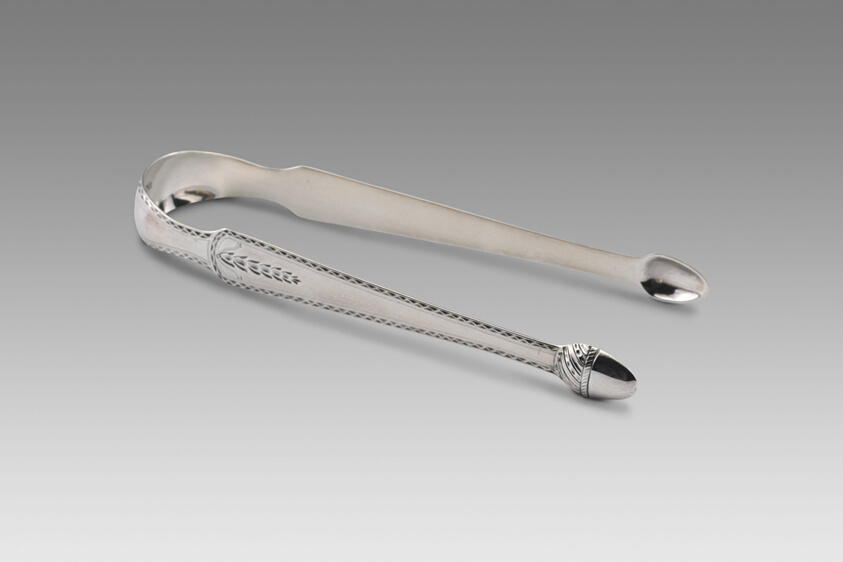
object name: Metalwork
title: Sugar Tongs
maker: Joseph Richardson Jr.; American, 1752–1831; Nathaniel Richardson; American, 1754–1827; Philadelphia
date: 1785–91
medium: Silver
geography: Philadelphia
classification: utensil for serving food; silver; utensil; american decorative arts; american arts; decorative arts